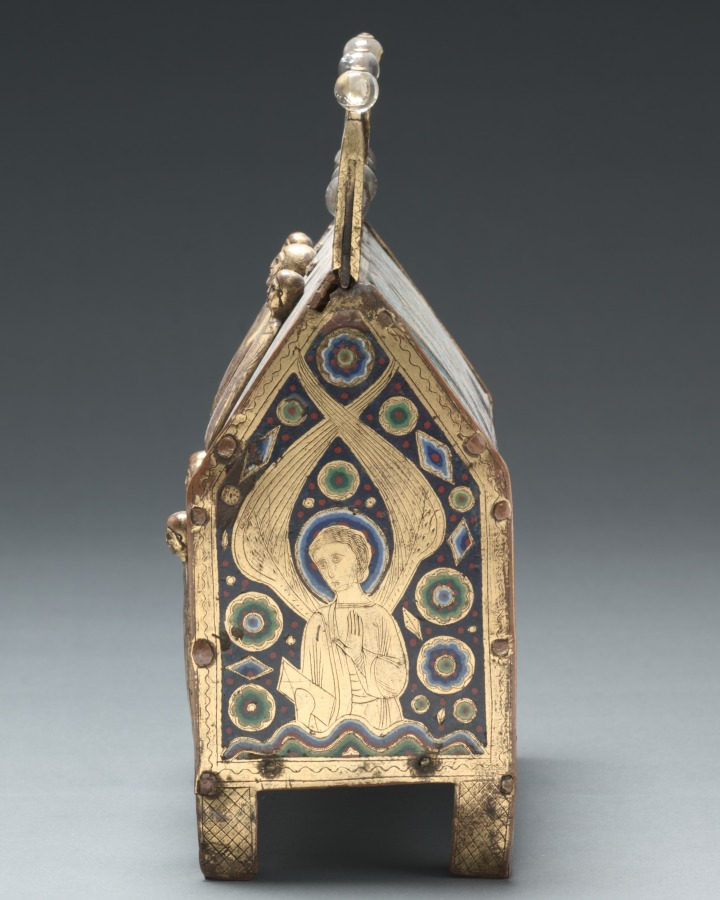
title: Chasse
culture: France, Limousin, Limoges, Gothic period, 13th century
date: c. 1225–50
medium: copper: repoussé, engraved, stippled, and gilded; champlevé enamel; oak core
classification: Enamel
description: A chasse is a container with a pyramid-shaped roof that once served as a shrine for sacred relics. During the medieval period, chasses like this one were placed on church altars during high feast days to allow the faithful to venerate their sacred contents. The chasse’s design and imagery follow a common formula with Christ’s Crucifixion and Majesty decorating the central fields of its principal face. The back consists of two panels with identical decoration. Each features three busts of angels inscribed in medallions. Of the chasse’s lateral sides, only one is preserved in its original state, decorated with the figure of an imposing angel emerging from a bank of clouds. Here, the dark blue enamel background shows an even greater variety of rosettes and other decorative motifs, all engraved, stippled, and gilded like the ones on the other sides